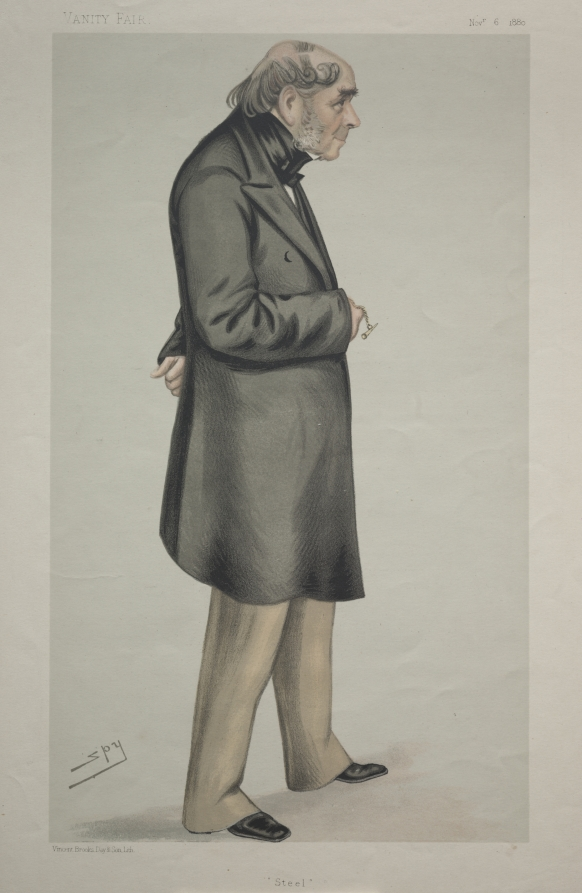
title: Steel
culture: England, 19th century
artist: Leslie Matthew (Spy) Ward (British, 1851–1922)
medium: color lithograph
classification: Print